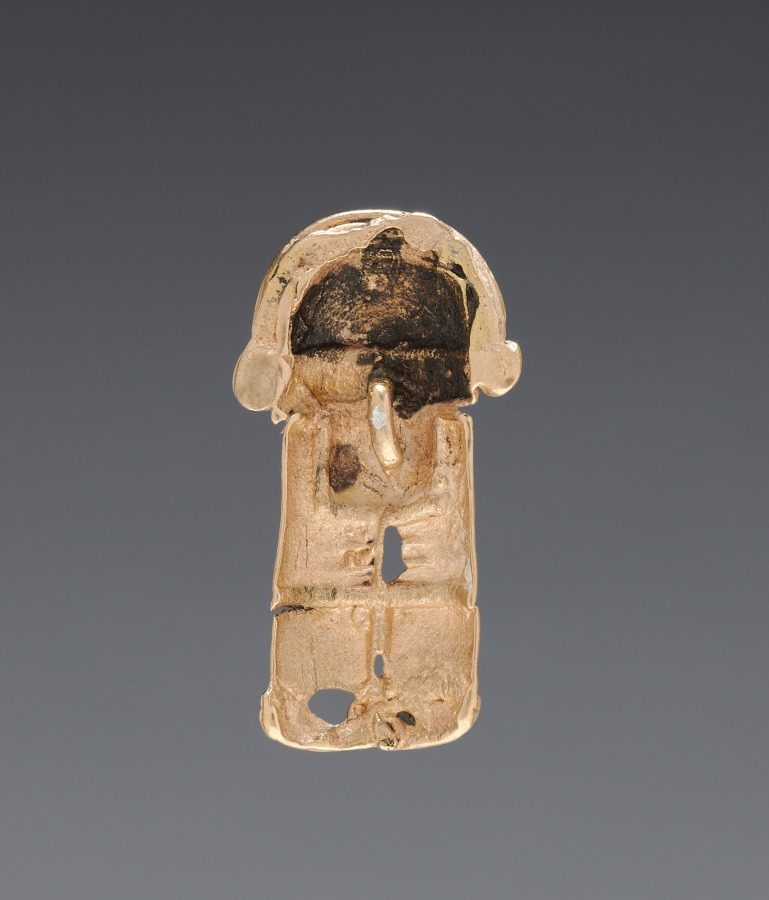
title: Necklace Figurine Bead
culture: Colombia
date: 1–700 CE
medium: cast gold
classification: Jewelry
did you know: Working with gold dates back to at least 500 BC in Ecuador and Colombia.